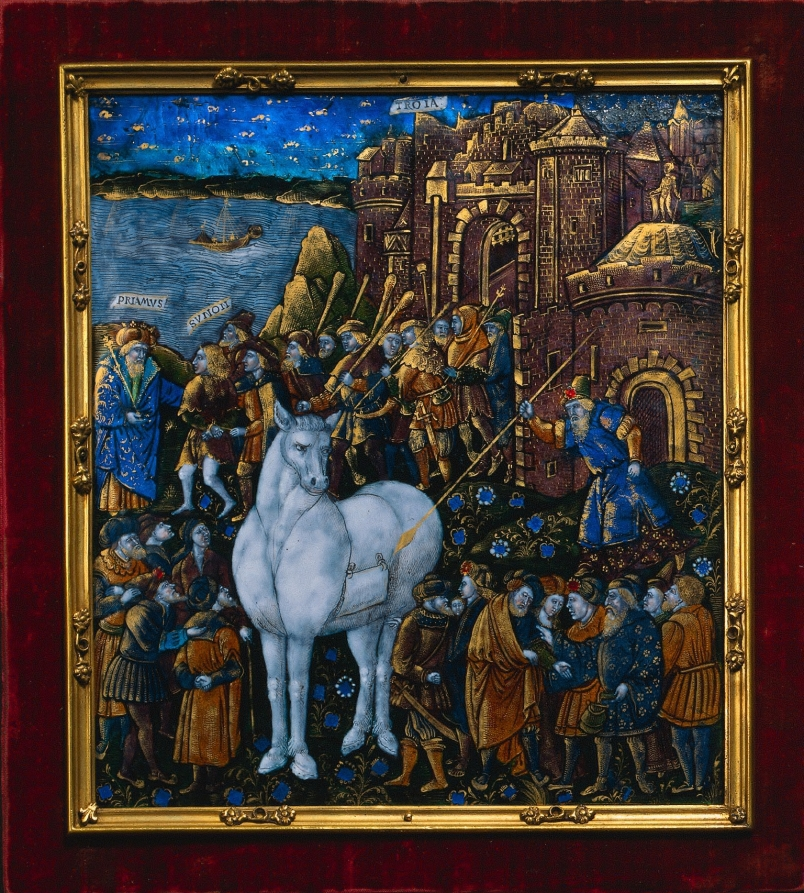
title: Plaque Depicting the Trojan Horse from the Aeneid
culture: France, Limoges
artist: Master of the Aeneid Series (French)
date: c. 1530–40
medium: painted enamel on copper, gilt-silver frame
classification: Enamel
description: This plaque is among the earliest examples of the technique of enamel on copper used during the Renaissance to depict secular scenes. Although it illustrates a passage from the ancient text of the Aeneid, the architecture and dress are more reflective of the courtly style popular in 16th-century France, when this work was made.